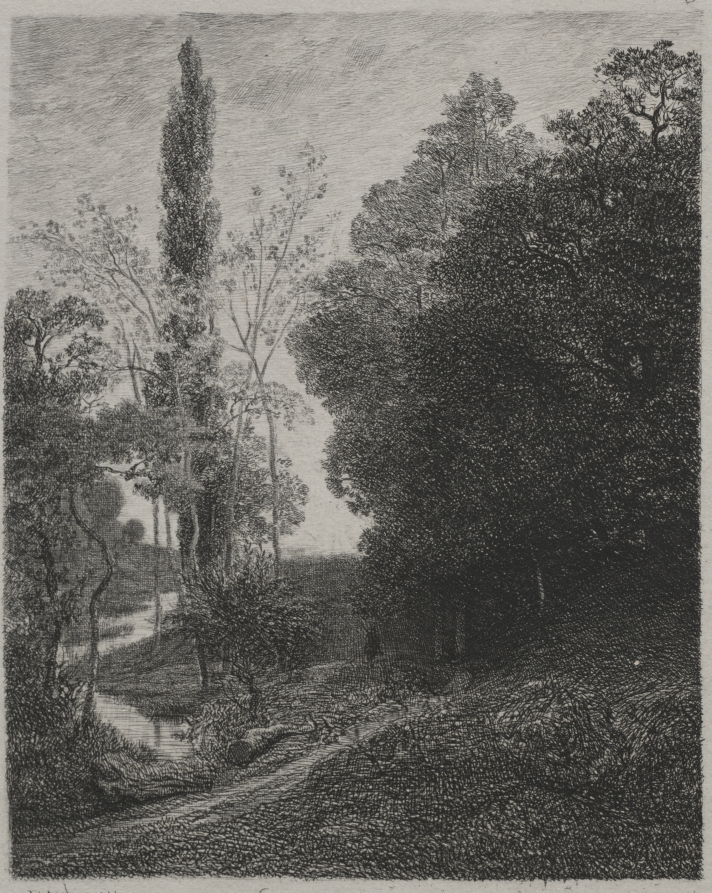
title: Banks of the River Cousin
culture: France, 19th century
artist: Charles François Daubigny (French, 1817–1878)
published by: Auguste Delâtre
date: 1850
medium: etching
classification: Print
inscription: signed, lower left, in plate: Daubigny; upper right, in plate: 3